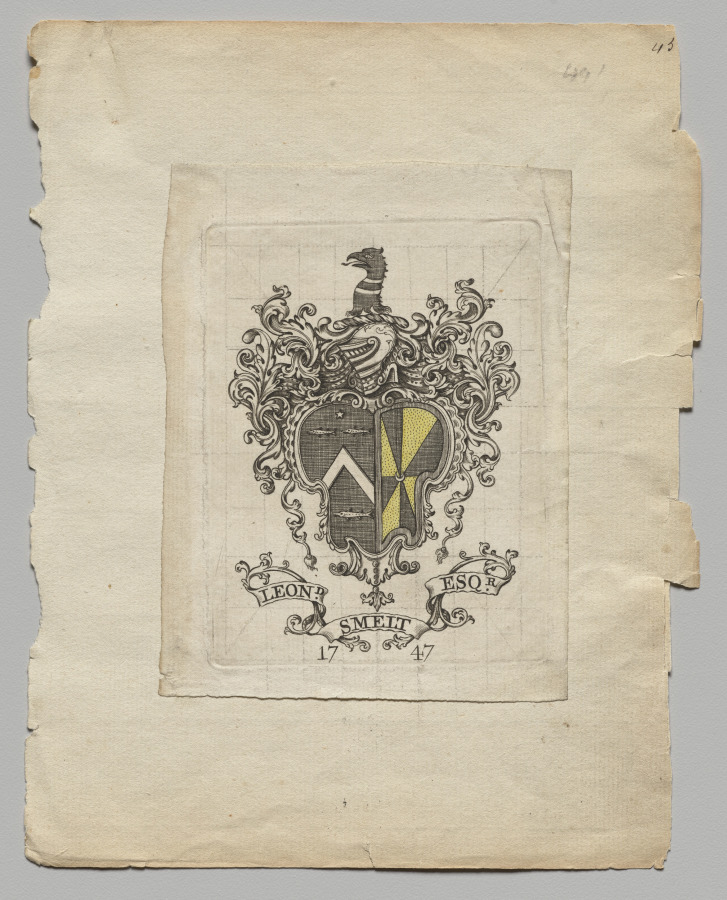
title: Bookplate: Leonard Smelt, Esq.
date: 1747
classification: Print